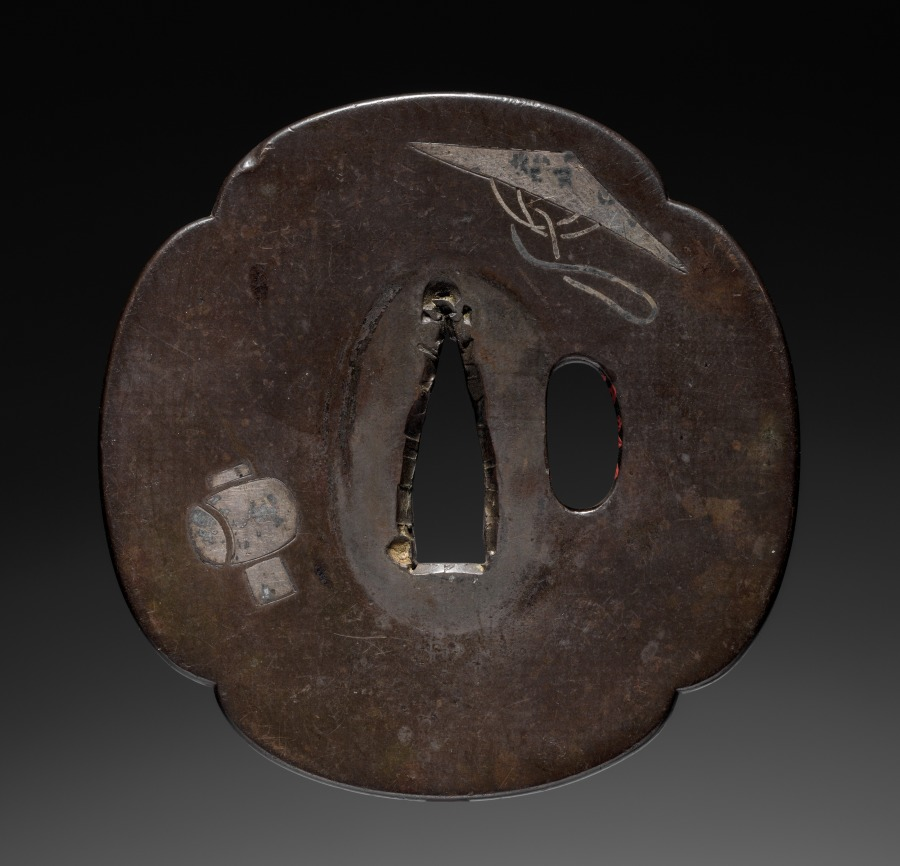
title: Sword Guard (Tsuba) with Treasure Motifs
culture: Japan, possibly Edo period (1615-1868)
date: c. 1615–1868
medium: iron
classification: Arms and Armor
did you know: This sword guard features the sacred jewel, magic mallet, hat of invisibility, and magic bag motifs.